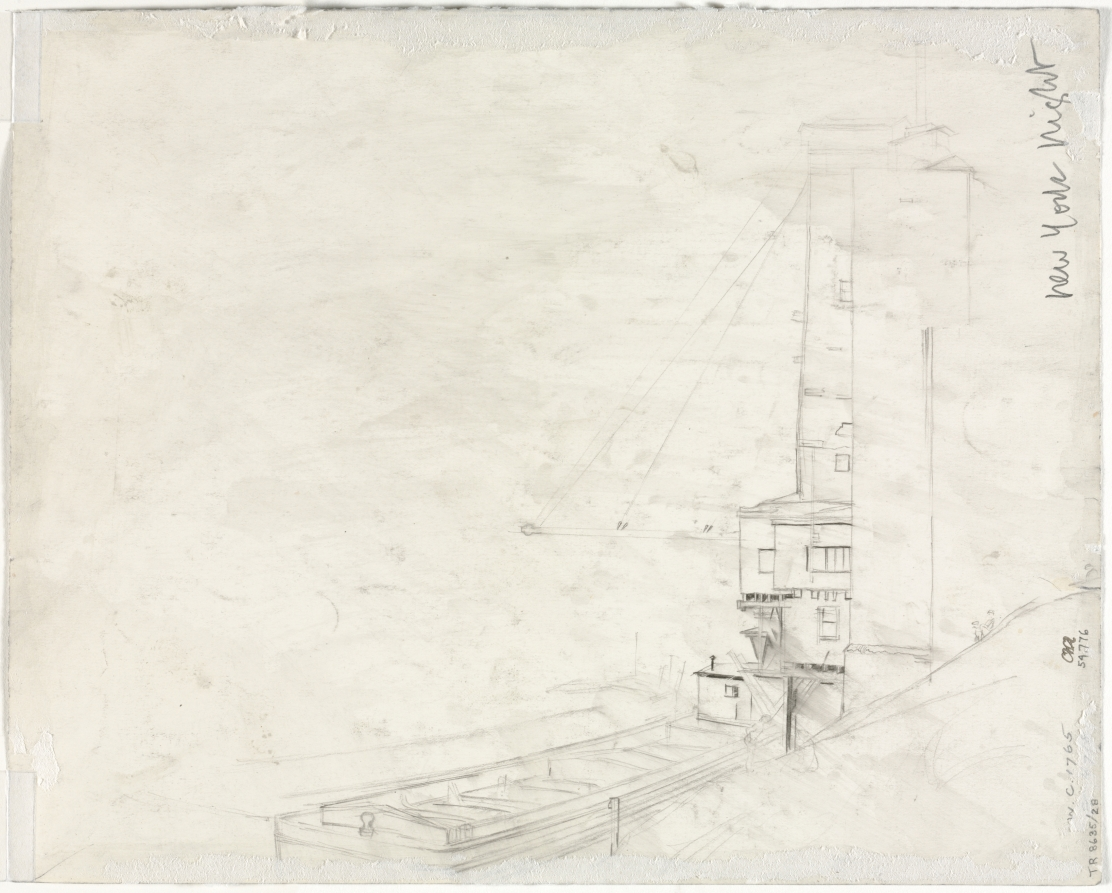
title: Study for New York Night (verso)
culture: England, 20th century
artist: Muirhead Bone (British, 1876–1953)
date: c. 1920–40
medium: graphite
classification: Drawing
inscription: lower right, in graphite: New York Night [by artist?] ; lower left, in graphite: W. C. 1765 / C 4718 [?--effaced by residue from old mounting]